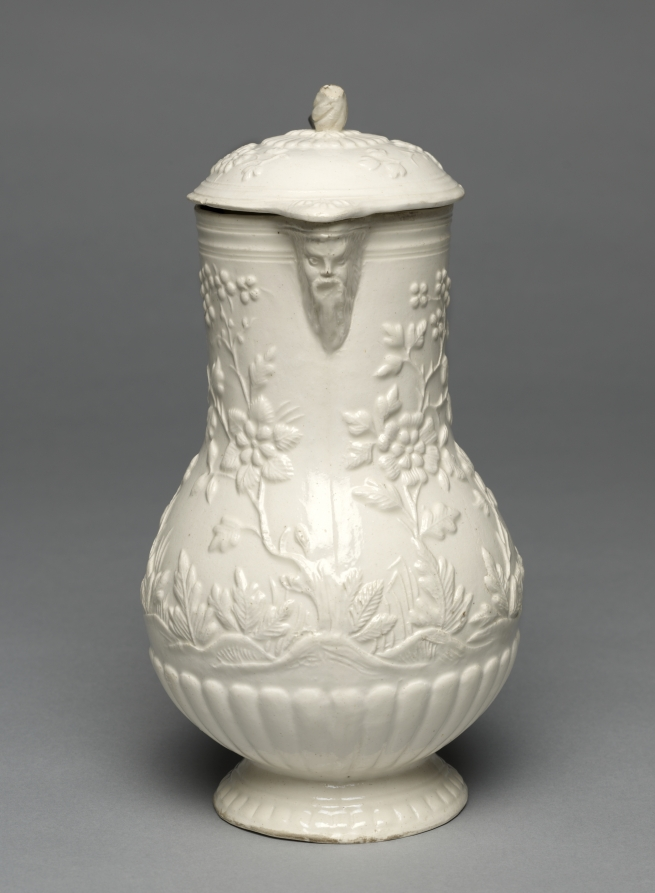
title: Covered Milk Jug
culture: France, Paris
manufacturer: Pont-aux-Choux Factory (French)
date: c. 1770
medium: Lead- glazed earthenware (faience fine); pewter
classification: Ceramic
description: Cream-colored earthenware was introduced by Wedgwood in the 1760s. He exported it to the continent, where it was quickly imitated. In France the ware was known as faience fine and the Pont-aux-Choux factory in Paris was the most famous manufacturer of such wares. Cream ware was harder and thus more durable than traditional faience.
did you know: Milk jugs with lids or covers usually held warm milk for coffee or tea.